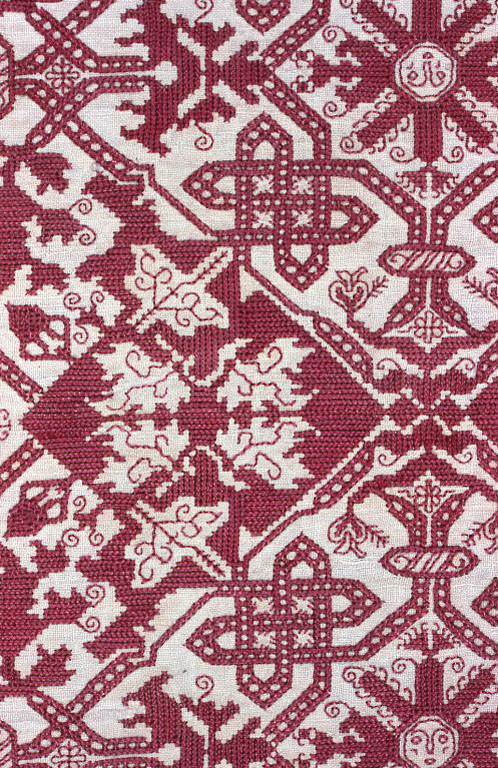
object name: Religious/Ritual Object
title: Altar Frontal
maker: Italy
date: 17th century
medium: Linen, plain weave; embroidered in silk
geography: Italy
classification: textile; needlework (visual works); altar; ritual objects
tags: altar